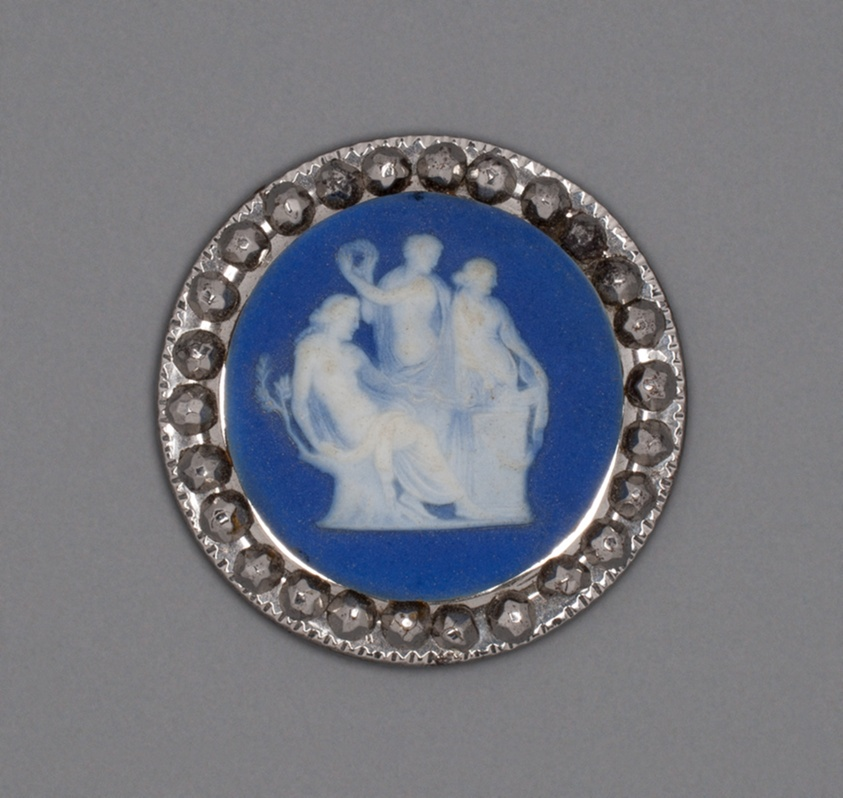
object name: Ceramics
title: Button with Sacrifice to Hygieia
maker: Wedgwood Manufactory (England, founded 1759)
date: Late 18th century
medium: Stoneware (jasperware)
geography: Burslem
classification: accessories (object genre); stoneware; european decorative arts; ceramics